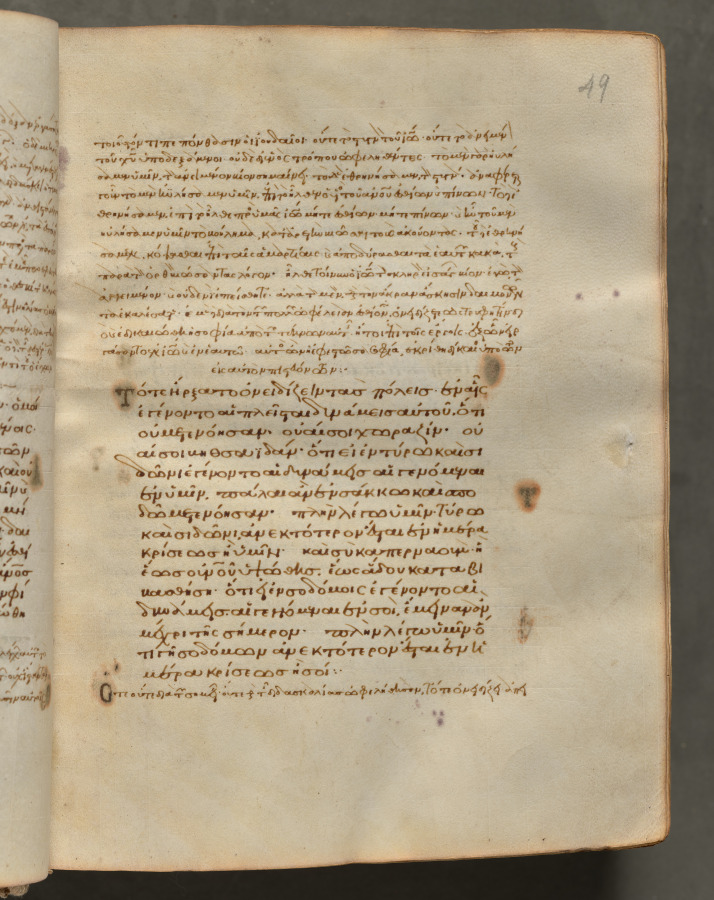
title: Text, folio 49 (recto), from a Gospel Book with Commentaries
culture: Byzantium, Constantinople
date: c. 1000–1100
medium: ink, tempera, and gold on vellum; leather binding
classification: Bound Volume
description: Each of the four gospels in this book opens on a page with brilliantly illuminated borders depicting the author of the text as well as birds-principally peacocks, symbols of the immortality of the soul-and fountains, representing the fountain of life and the salvation of the soul. This volume consists of 428 leaves with texts in Greek. Its level of sophistication suggests that it was probably written and decorated in a monastery in Constantinople.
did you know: Gospel Books were carried in procession through Byzantine churches.